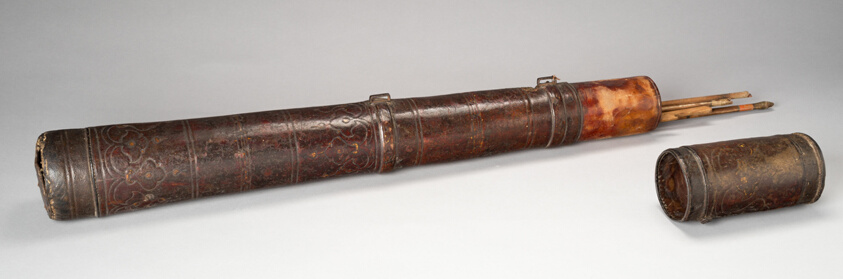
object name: Arms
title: Quiver in Mideastern Manner with Associated Arrows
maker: Italian, Venice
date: c. 1800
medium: Leather, polychromy, iron, wood Tooled leather (cuir bouilli) originally painted and gilded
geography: Venice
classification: arms and armor, miscellaneous; arms and armor; arms